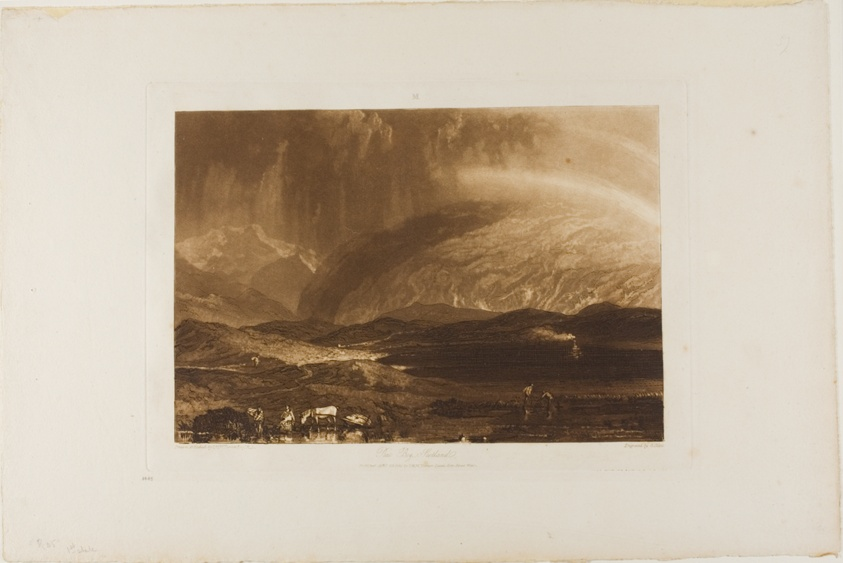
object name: Print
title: Peat Bog, Scotland, plate 45 from Liber Studiorum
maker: Joseph Mallord William Turner (English, 1775-1851); Engraved by G. Clint (English, 1770-1854)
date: Published April 23, 1812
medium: Etching and mezzotint on ivory wove paper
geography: England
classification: etching; print; prints and drawing